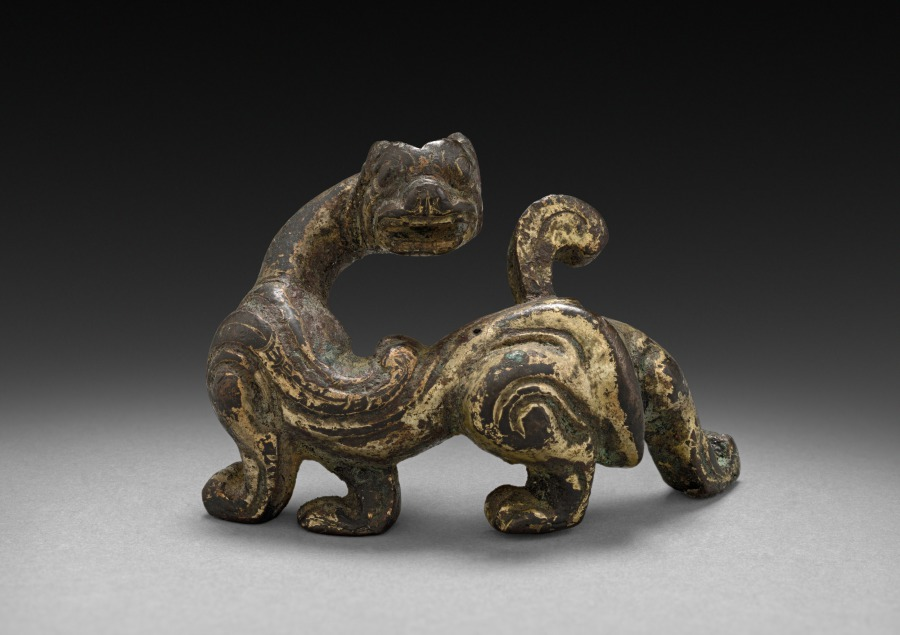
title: Fantastic Lion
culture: China, Han dynasty (202 BCE–220 CE)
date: 206 BCE–220 CE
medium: bronze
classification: Sculpture